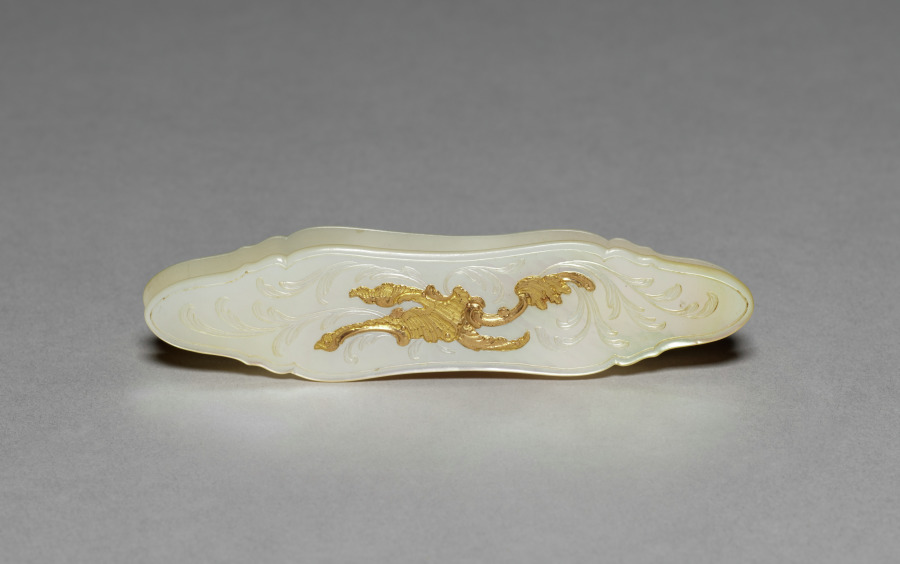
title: Tatting Bobbin from a Sewing Box (Nécessaire)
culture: Austria, possibly Vienna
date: c. 1765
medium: gold and mother-of-pearl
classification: Miscellaneous